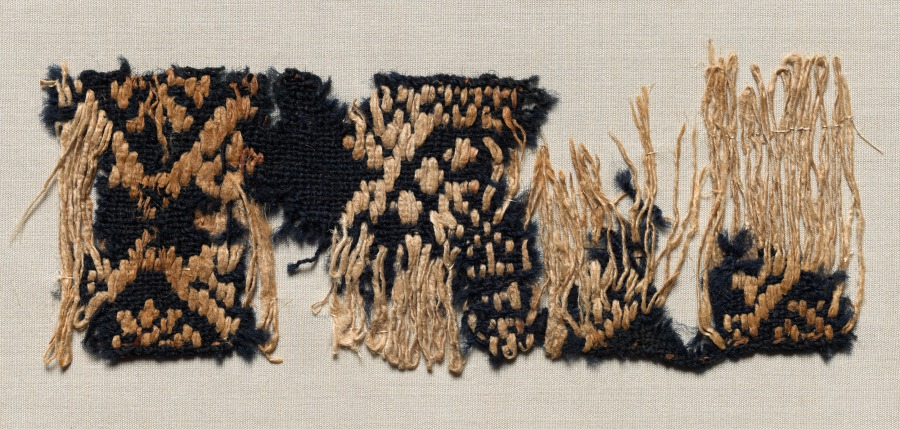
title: Fragment of Burial Clothing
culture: Egypt, Egypto-Arabic, c. 10th - 11th century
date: 900s - 1000s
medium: embroidery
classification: Embroidery